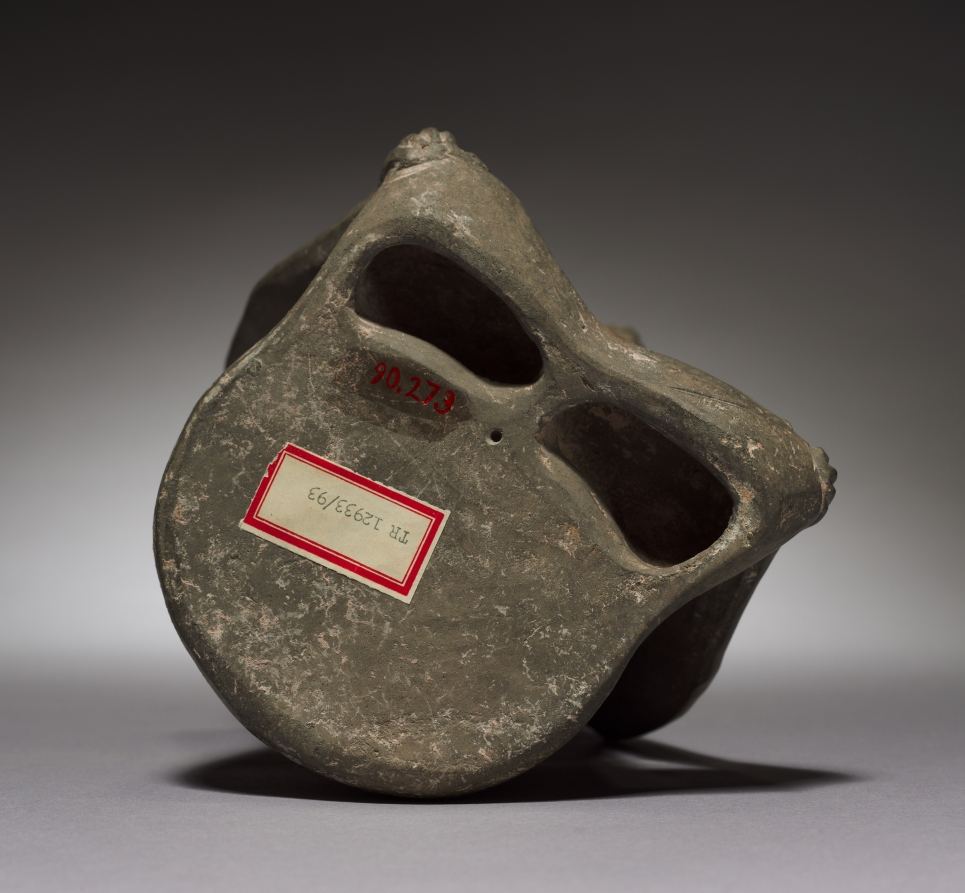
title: Urn Figure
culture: Mexico, Oaxaca, Zapotec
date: c. 150 BCE–200 CE (thermoluminescence date, 60 BCE–642 CE)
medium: earthenware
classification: Sculpture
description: This simply posed and costumed urn figure represents a goddess, or perhaps an ancestress. Early Zapotec ceramic art has a spare elegance that contrasts strongly with the florid ornamentation of later works.